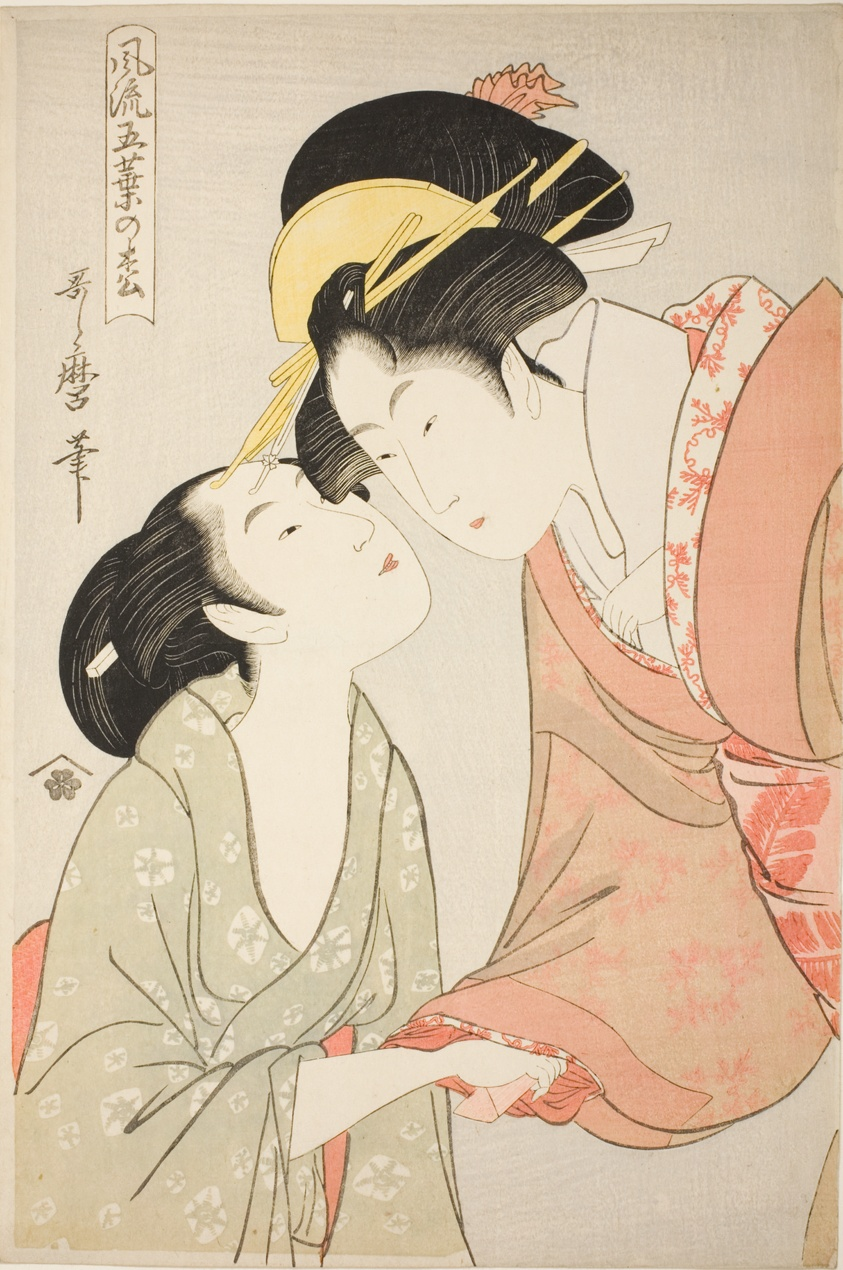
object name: Print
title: Messenger with a Letter, from the series "Elegant Five-needled Pine (Furyu goyo no matsu)"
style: Japanese (culture or style)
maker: Kitagawa Utamaro 喜多川 歌麿; Japanese, 1753 (?)-1806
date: c. 1797/98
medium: Color woodblock print; oban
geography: Japan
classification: woodblock print; print; asian art